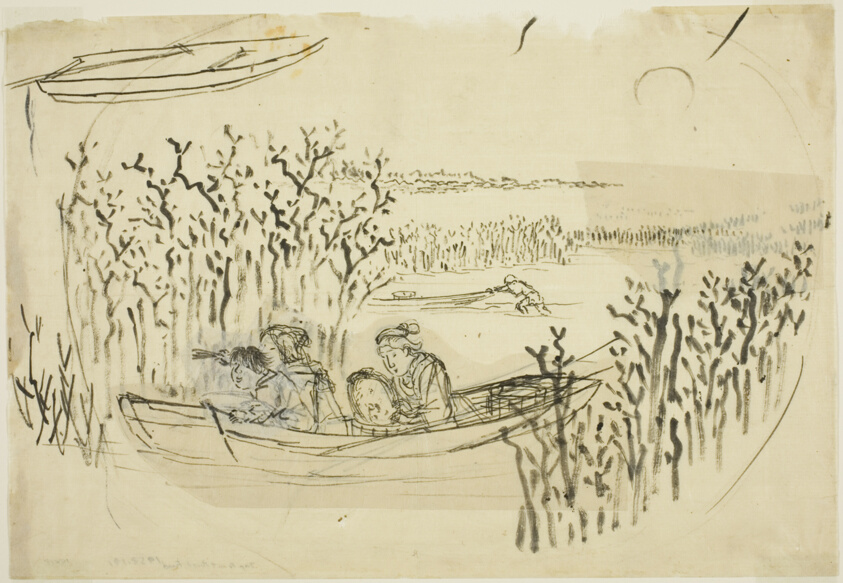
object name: Drawing and Watercolor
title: Gathering Seaweed at Omori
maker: Utagawa Kuniyoshi (Japanese, 1797-1861)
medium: Ink and red pigment on paper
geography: Japan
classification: woodblock print; print; asian art